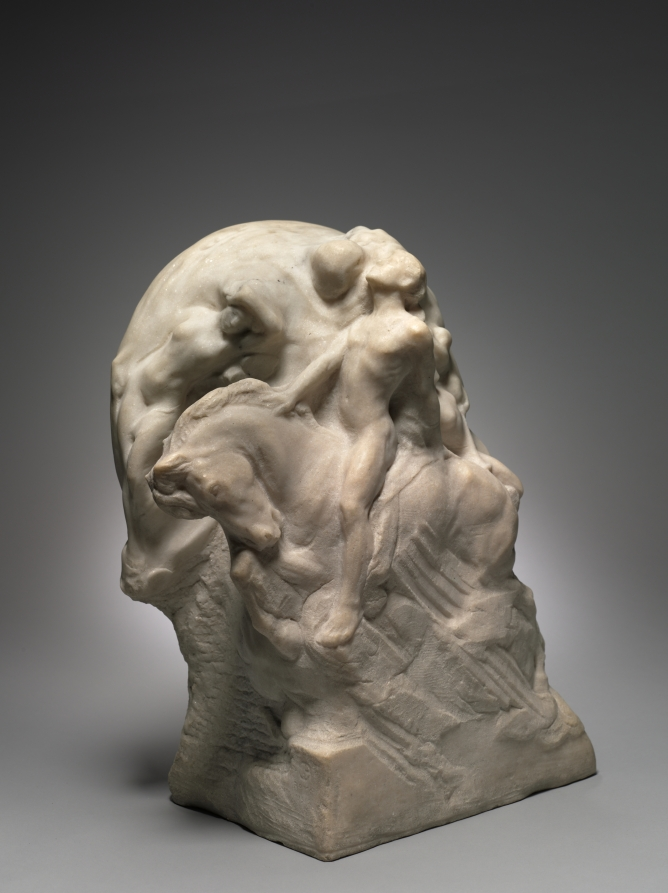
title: Dawn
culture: America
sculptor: Chester Beach (American, 1881–1956)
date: 1912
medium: marble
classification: Sculpture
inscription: Signed on side: CB (monogram) Roma 1912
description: Created while Chester Beach was living in Rome, Dawn features a nude man on horseback against a background of human forms emerging from a cloud of rolling mist. Although carved in the round from a block of marble, the sculpture has one primary view.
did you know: Chester Beach traded two of his sculptures to a farmer in Brewster, NY, obtaining land where he built his studio and a summer home.